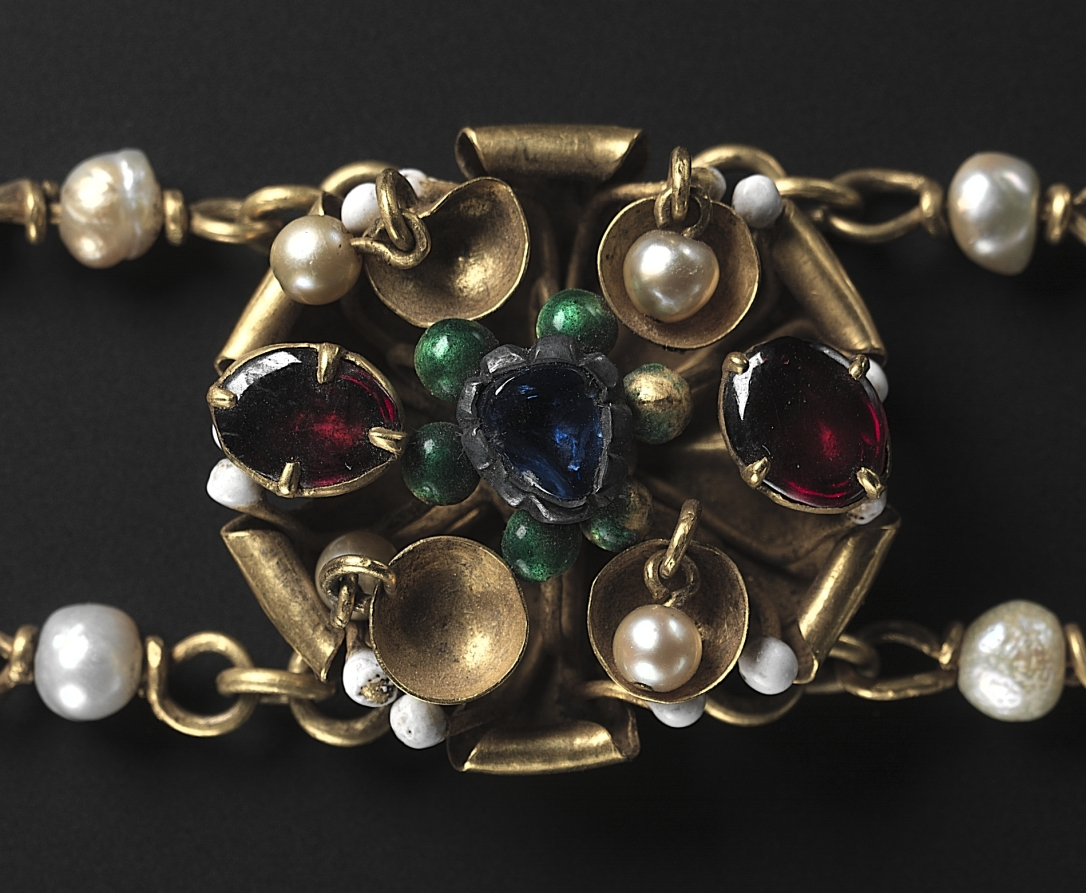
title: Twelve Medallions Mounted as a Necklace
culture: France, Paris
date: c. 1400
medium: enameled gold, precious stones, and pearls; some later additions with modern chain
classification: Jewelry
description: These medallions, which have loops on the backs, must have originally been sewn onto a garment or, more likely, a woman’s headpiece. In spite of the modern chain to which they are now attached, the medallions are unique items of feminine apparel from around 1400. Such items would have been well known at the courts of the Valois in Paris, Bourges, and Dijon. The central medallion with a “white lady” is enameled “in the round”––a new Parisian technique for enameling irregular or three-dimensional surfaces. Such white lady medallions are described in inventories of the period